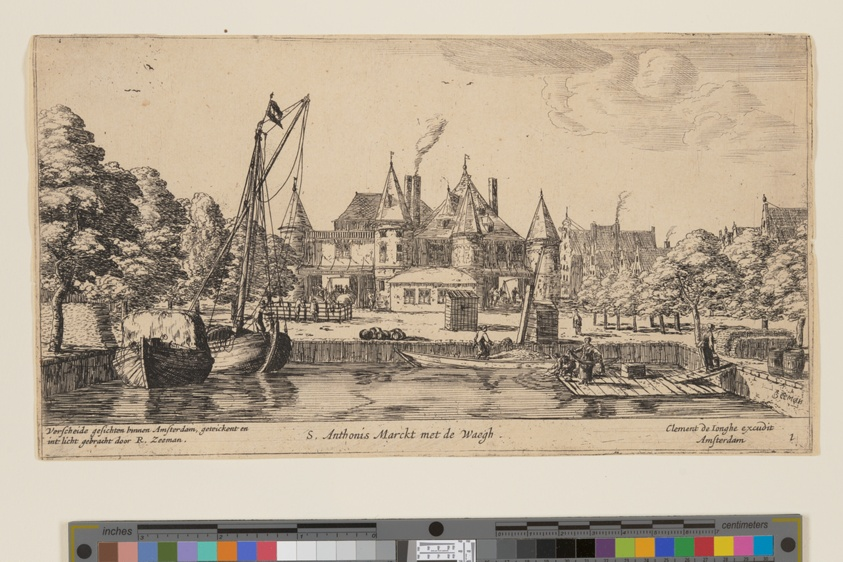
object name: Print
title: S. Anthonis Marckt met de Waegh, from Views of Amsterdam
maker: Reinier Nooms, called Zeeman (Dutch, c. 1623–1664)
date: c. 1660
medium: Etching on ivory laid paper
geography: Netherlands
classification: etching; paper; print; prints and drawing